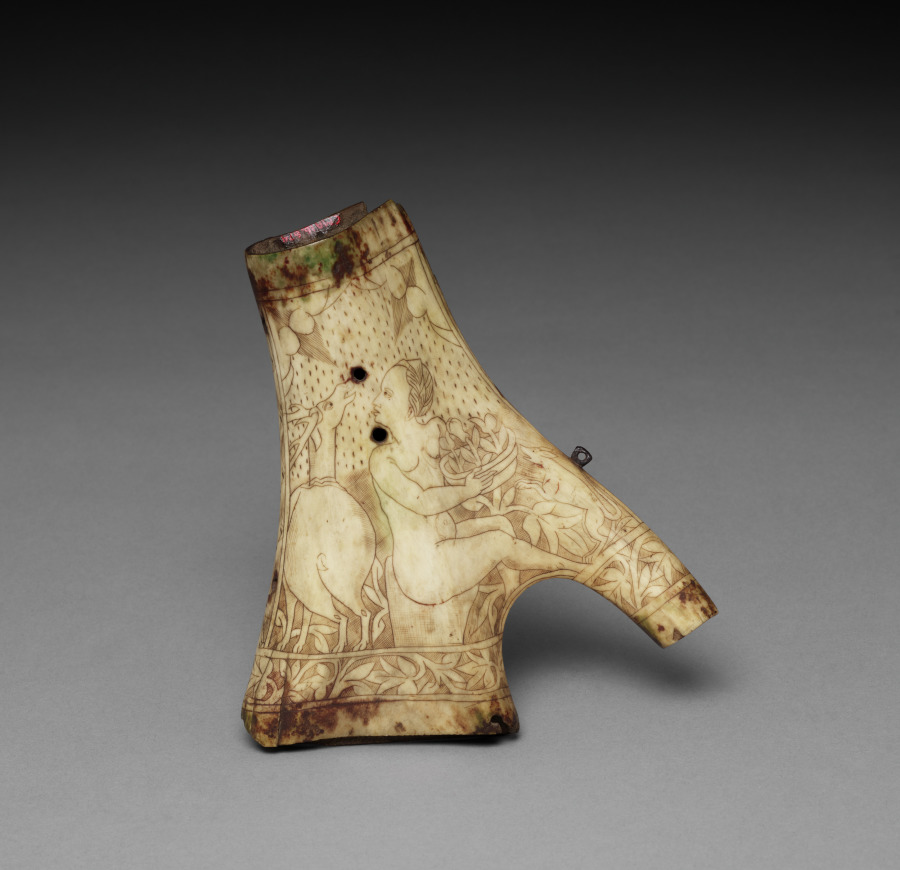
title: Powder Flask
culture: Germany, late 16th-early 17th century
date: c. 1575–1625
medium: horn (two branches); engraved allegorical scenes (unidentified); mounts missing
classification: Arms and Armor